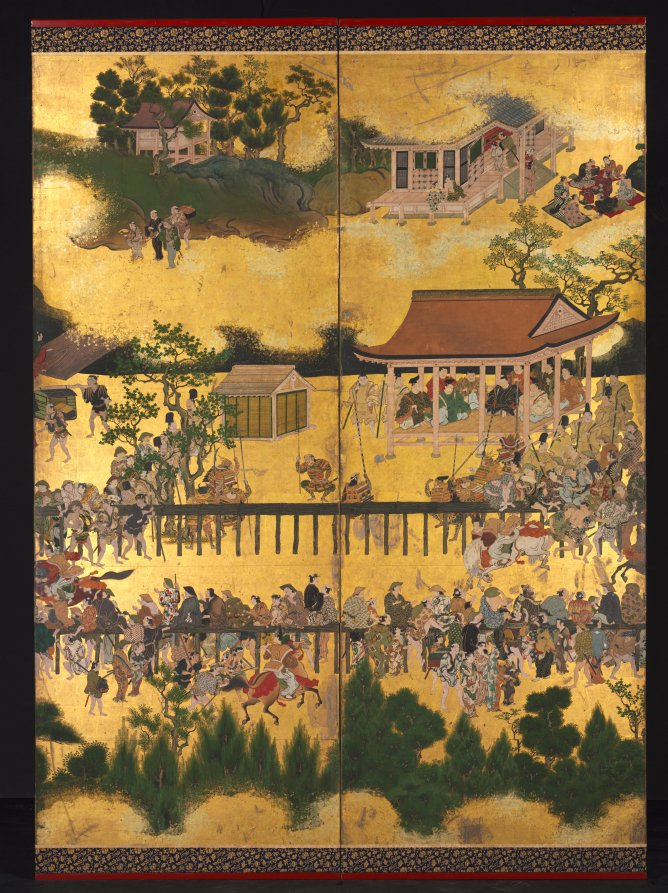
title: Horse Race at the Kamo Shrine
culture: Japan, Edo period (1615–1868)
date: early to mid-1600s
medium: One of a pair of six-panel folding screens; ink and color on gilded paper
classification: Painting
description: Kamo Shrine in Kyoto, seen in the upper half of the left screen, has held an annual horse race on May 5th since the ninth century. Serving as a snapshot of the festivities, this pair of screens captures nearly 600 people watching the race, beginning at the bottom part of the right screen and continuing to the left. The race is a great spectacle where aristocratic riders cling to their fast and unwieldy mounts. While many of those in attendance seem in rapt attention to the main event, other vignettes depict people engaged in an array of activities. This pair of screens was likely originally part of a group of linked murals.